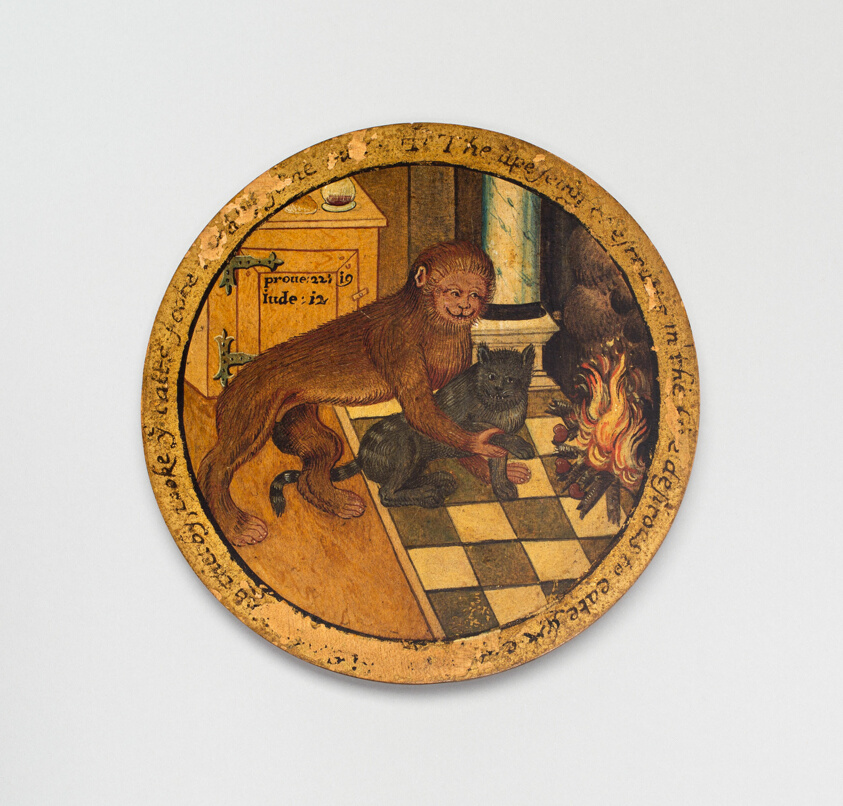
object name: Decorative Arts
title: Trencher with a Scene from Aesop's Fables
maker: England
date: c. 1600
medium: Sycamore, painted and gilded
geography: England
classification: wood; european decorative arts; decorative arts